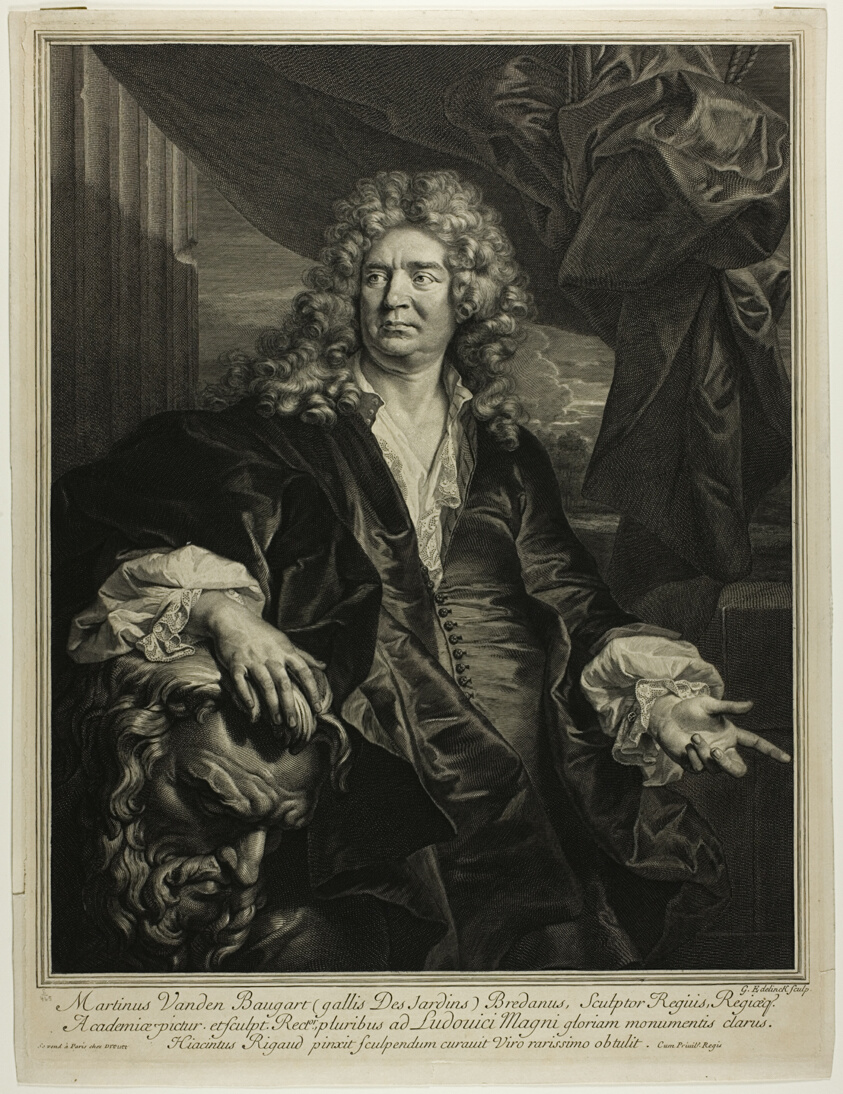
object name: Print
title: Martin Vanden Bogaert Desjardins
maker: Gérard Edelinck (French, born Flanders, 1640-1707); after Hyacinthe Rigaud (French, 1659-1743)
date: 1698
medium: Engraving and etching on paper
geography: France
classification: engraving; print; prints and drawing